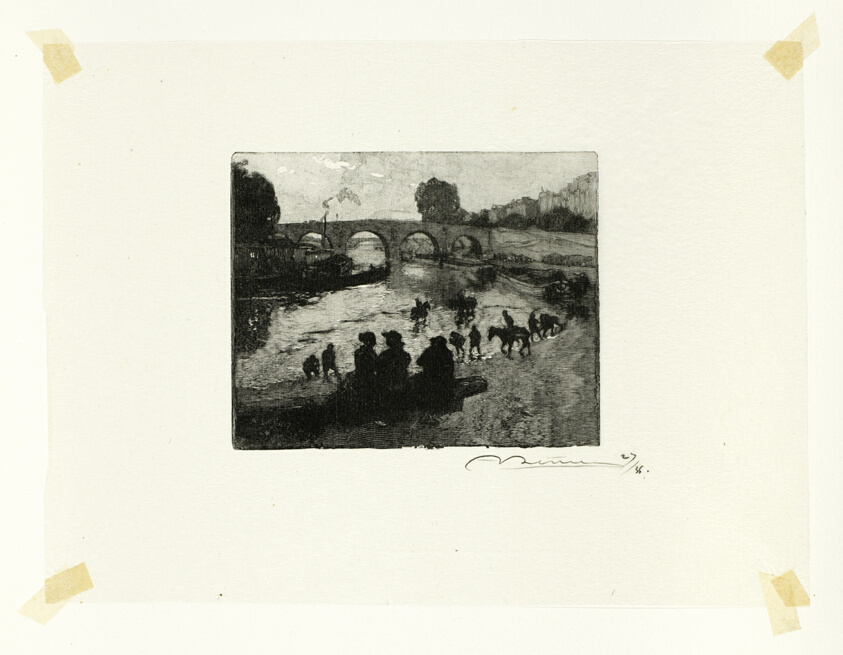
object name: Print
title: The Horse Pond at the Pont Marie, plate ten from Le Long de la Seine et des Boulevards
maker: Louis Auguste Lepère (French, 1849-1918); published by A. Desmoulins (French, active c. 1908-1910)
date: 1890, published 1910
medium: Wood engraving in black on cream Japanese tissue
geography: France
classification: wood engraving; paper; print; prints and drawing